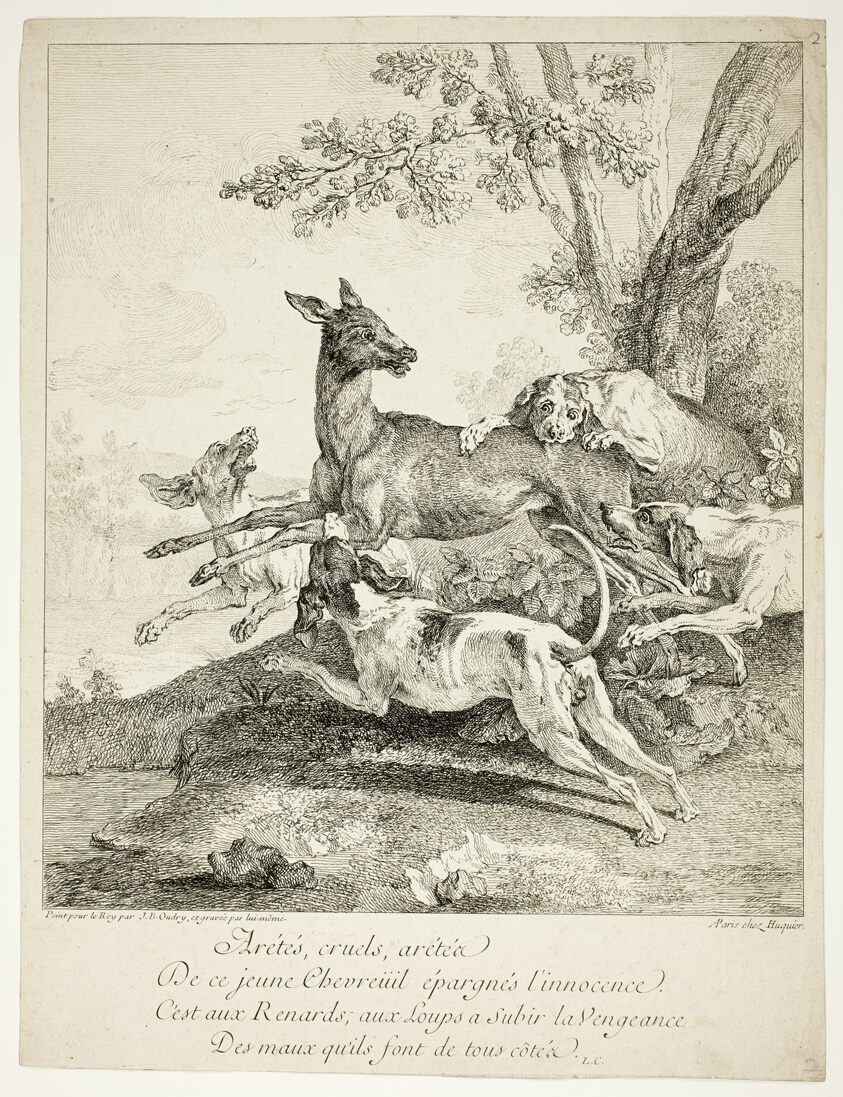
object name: Print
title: Deer Attacked by Dogs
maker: Jean-Baptiste Oudry (French, 1686-1755)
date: 1725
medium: Etching on cream laid paper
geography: France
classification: etching; print; prints and drawing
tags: dogs, animals